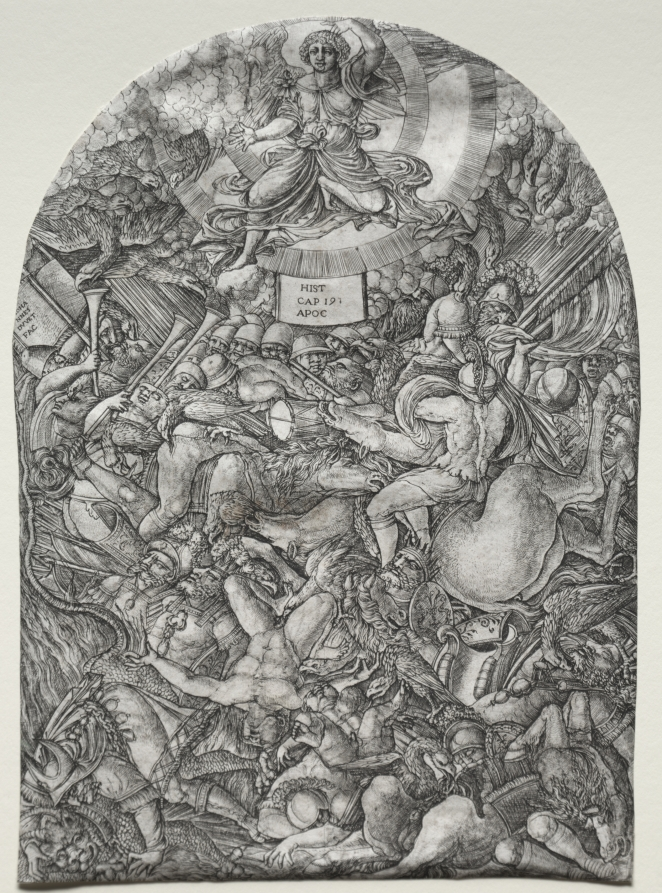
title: The Apocalypse: The Angel in the Sun Calling the Birds of Prey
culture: France, 16th century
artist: Jean Duvet (French, 1485–1561)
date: 1500s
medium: engraving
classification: Print